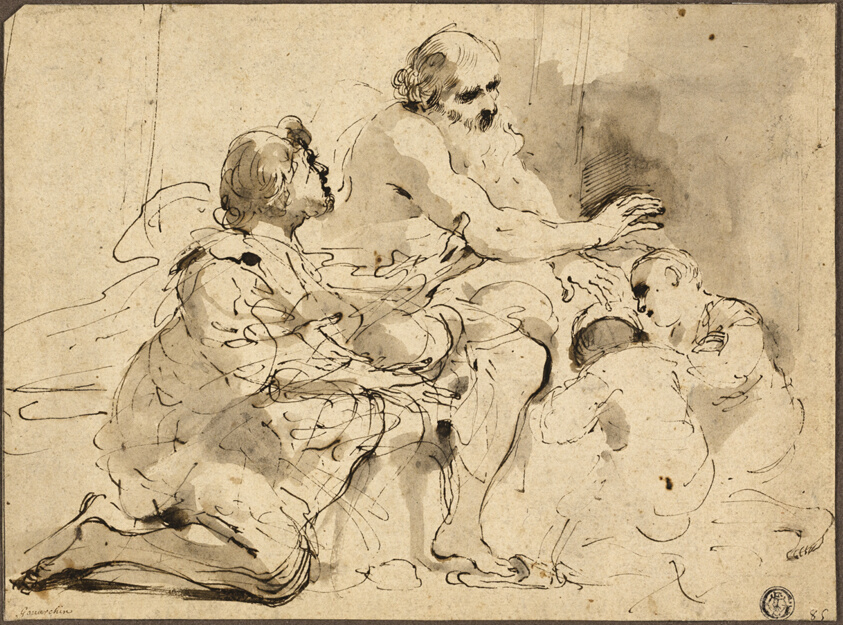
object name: Drawing and Watercolor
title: Study for Jacob Blessing the Sons of Joseph (recto); Sketches: Saint Christopher; Two Figures in Conversation over Money (verso)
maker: Giovanni Francesco Barbieri, called Guercino; Italian, 1591-1666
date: c. 1620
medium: Pen and brown ink, with brush and gray and brown wash (recto) and pen and brown ink and graphite (verso), on cream laid paper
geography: Italy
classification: pen and ink drawings; drawings (visual works); prints and drawing